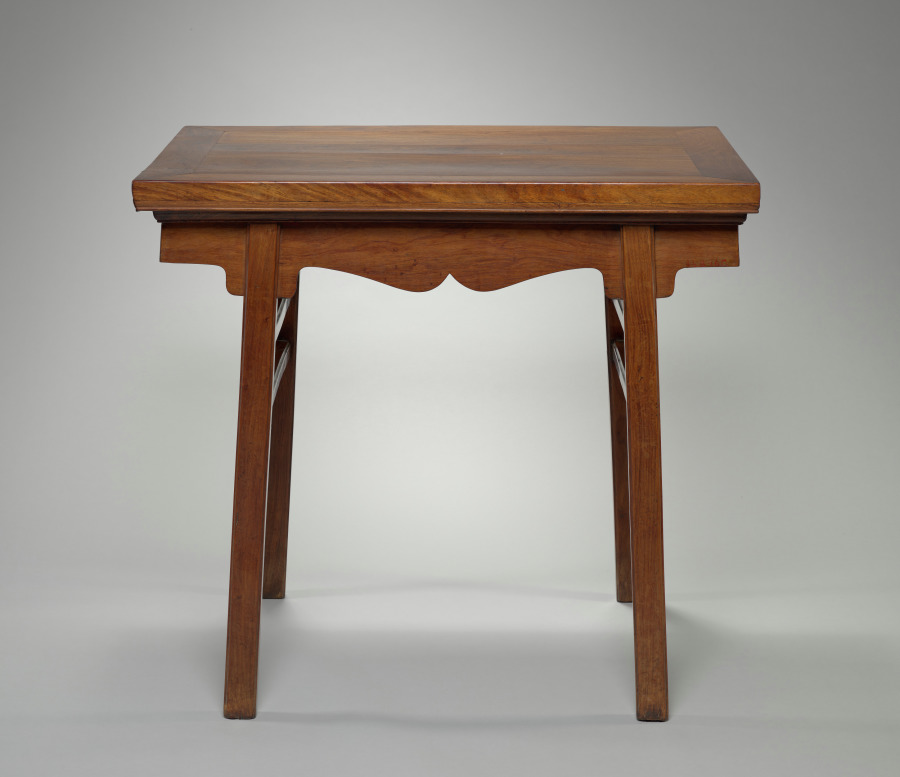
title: Game Table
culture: China, Ming dynasty (1368-1644) - Qing dynasty (1644-1911)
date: 1600s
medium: Rosewood (huanghuali)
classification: Furniture and woodwork